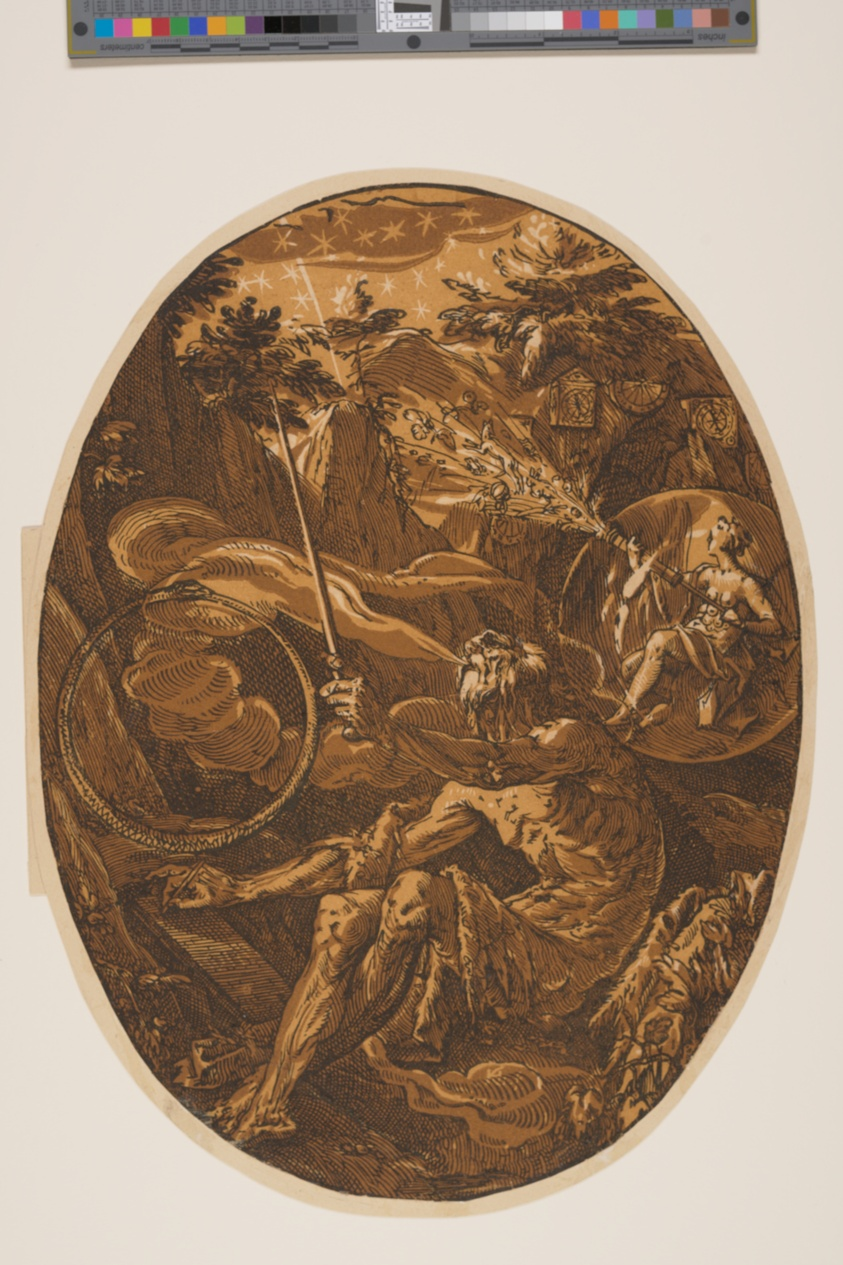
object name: Print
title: Demogorgon in the Cave of Eternity, from The Deities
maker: Hendrick Goltzius (Dutch, 1558–1617)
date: 1588/90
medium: Chiaroscuro woodcut from three blocks in orange-brown on ivory laid paper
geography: Netherlands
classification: print; paper; prints and drawing; woodcut